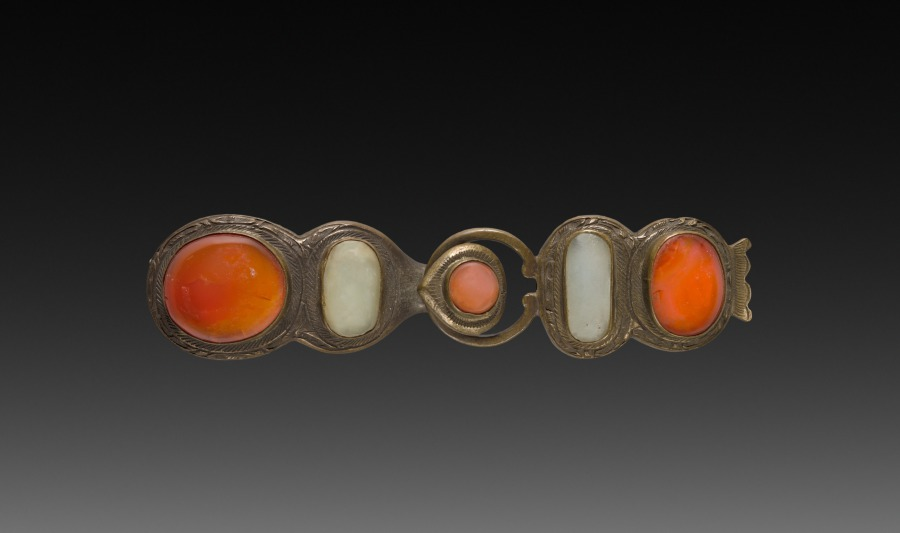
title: Buckle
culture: China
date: 1900s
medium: bronze, engraved and set with carnelian and jade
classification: Jewelry